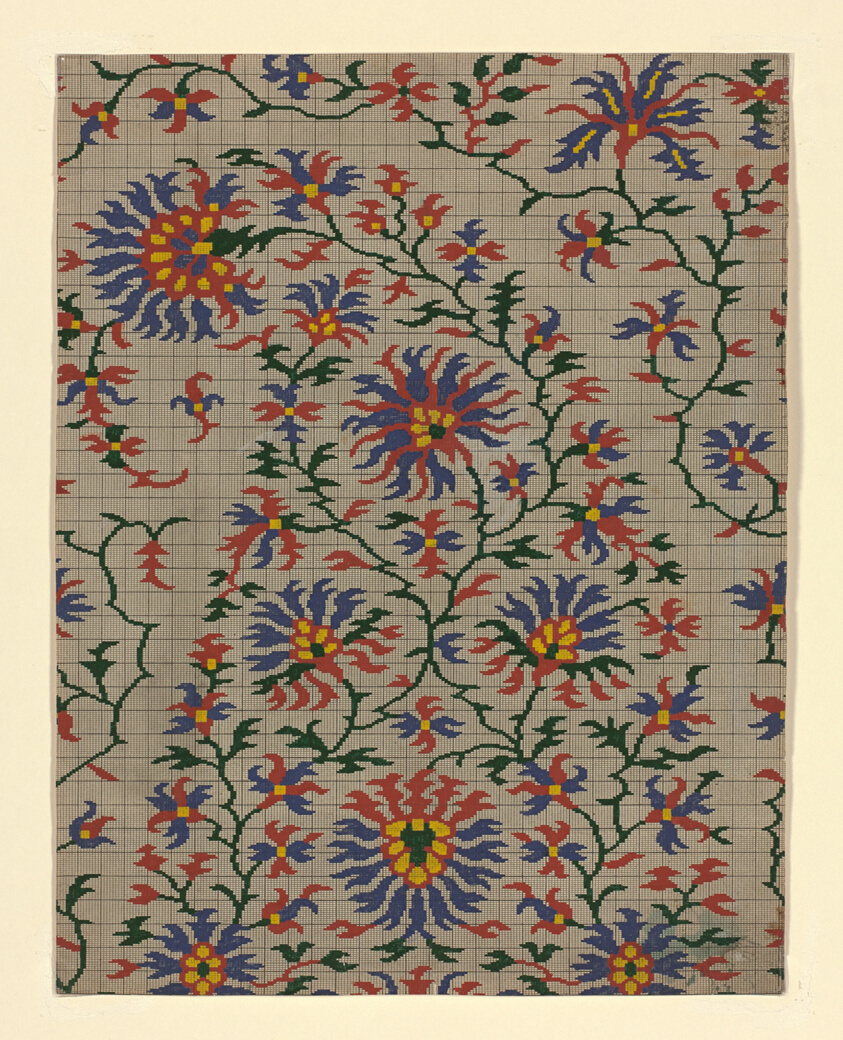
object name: Drawing and Watercolor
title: Mise-en-carte (Point-paper)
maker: France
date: 1760/90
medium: Ink and gouache on hand drawn graph paper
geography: France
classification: textile; accessory - paper design